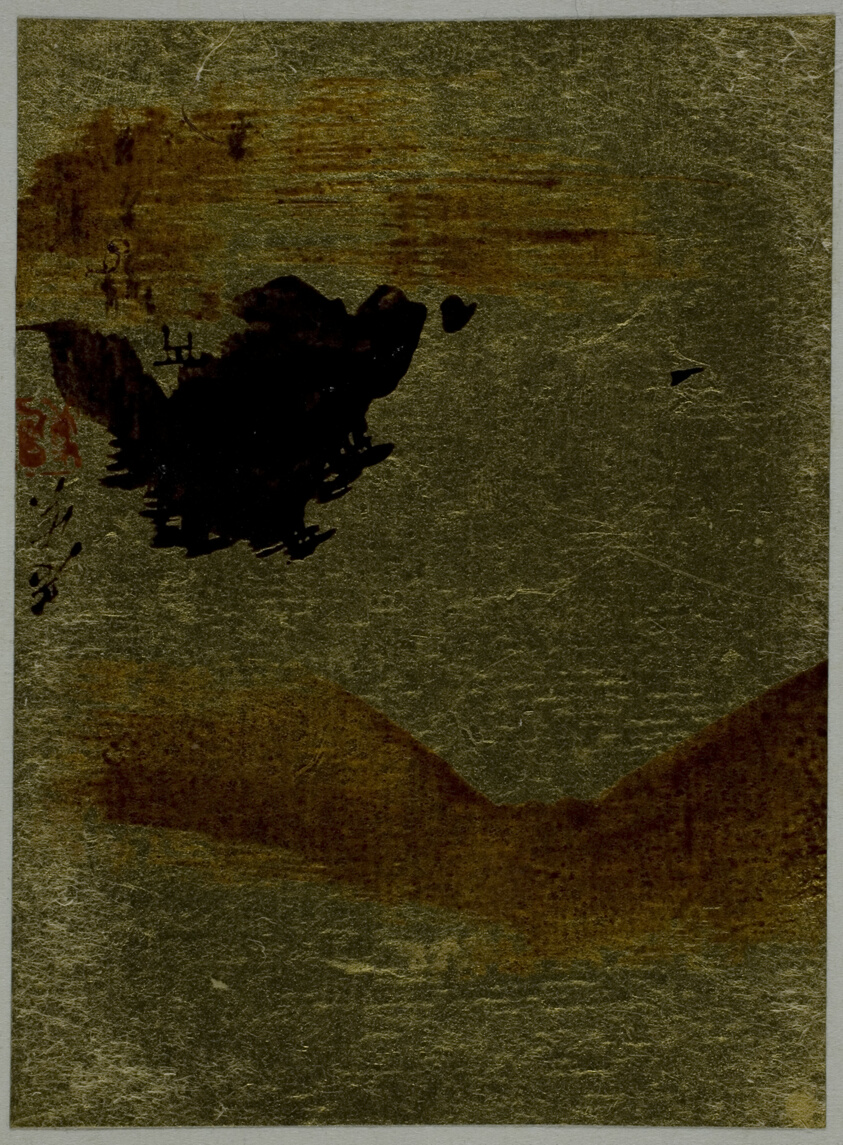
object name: Painting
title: Mountain and Landscape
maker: Shibata Zeshin (Japanese, 1807-1891)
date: Meiji period (1868–1912)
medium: Album leaf, inks and color on paper.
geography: Japan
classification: album leaf; album/sketchbook; asian art; painting